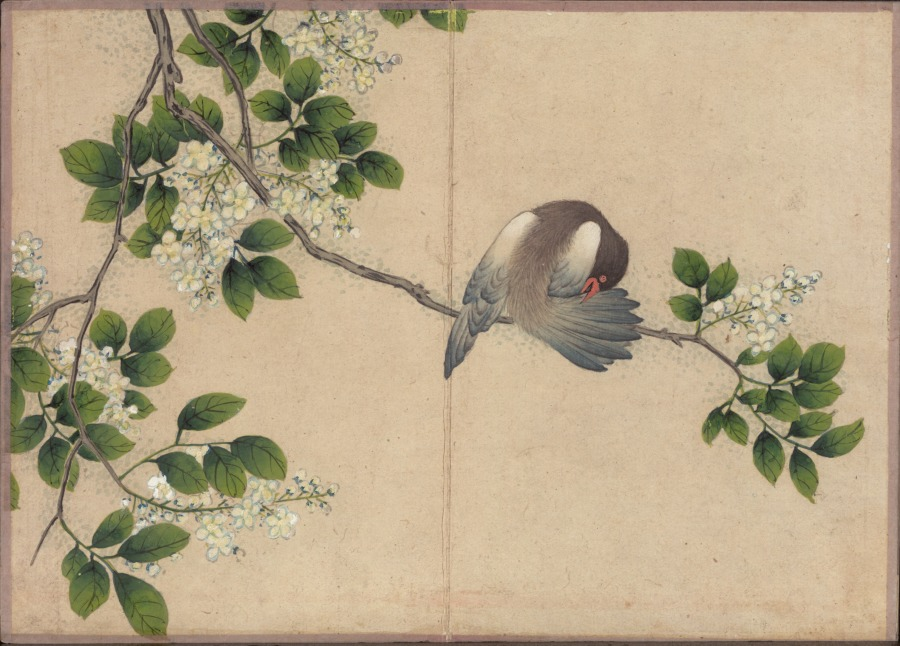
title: Desk Album: Flower and Bird Paintings (Preening Bird)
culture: China, Qing dynasty (1644-1911)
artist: Zhang Ruoai (Chinese, 1713–1746)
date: 1700s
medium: album leaf, ink and color on paper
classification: Painting